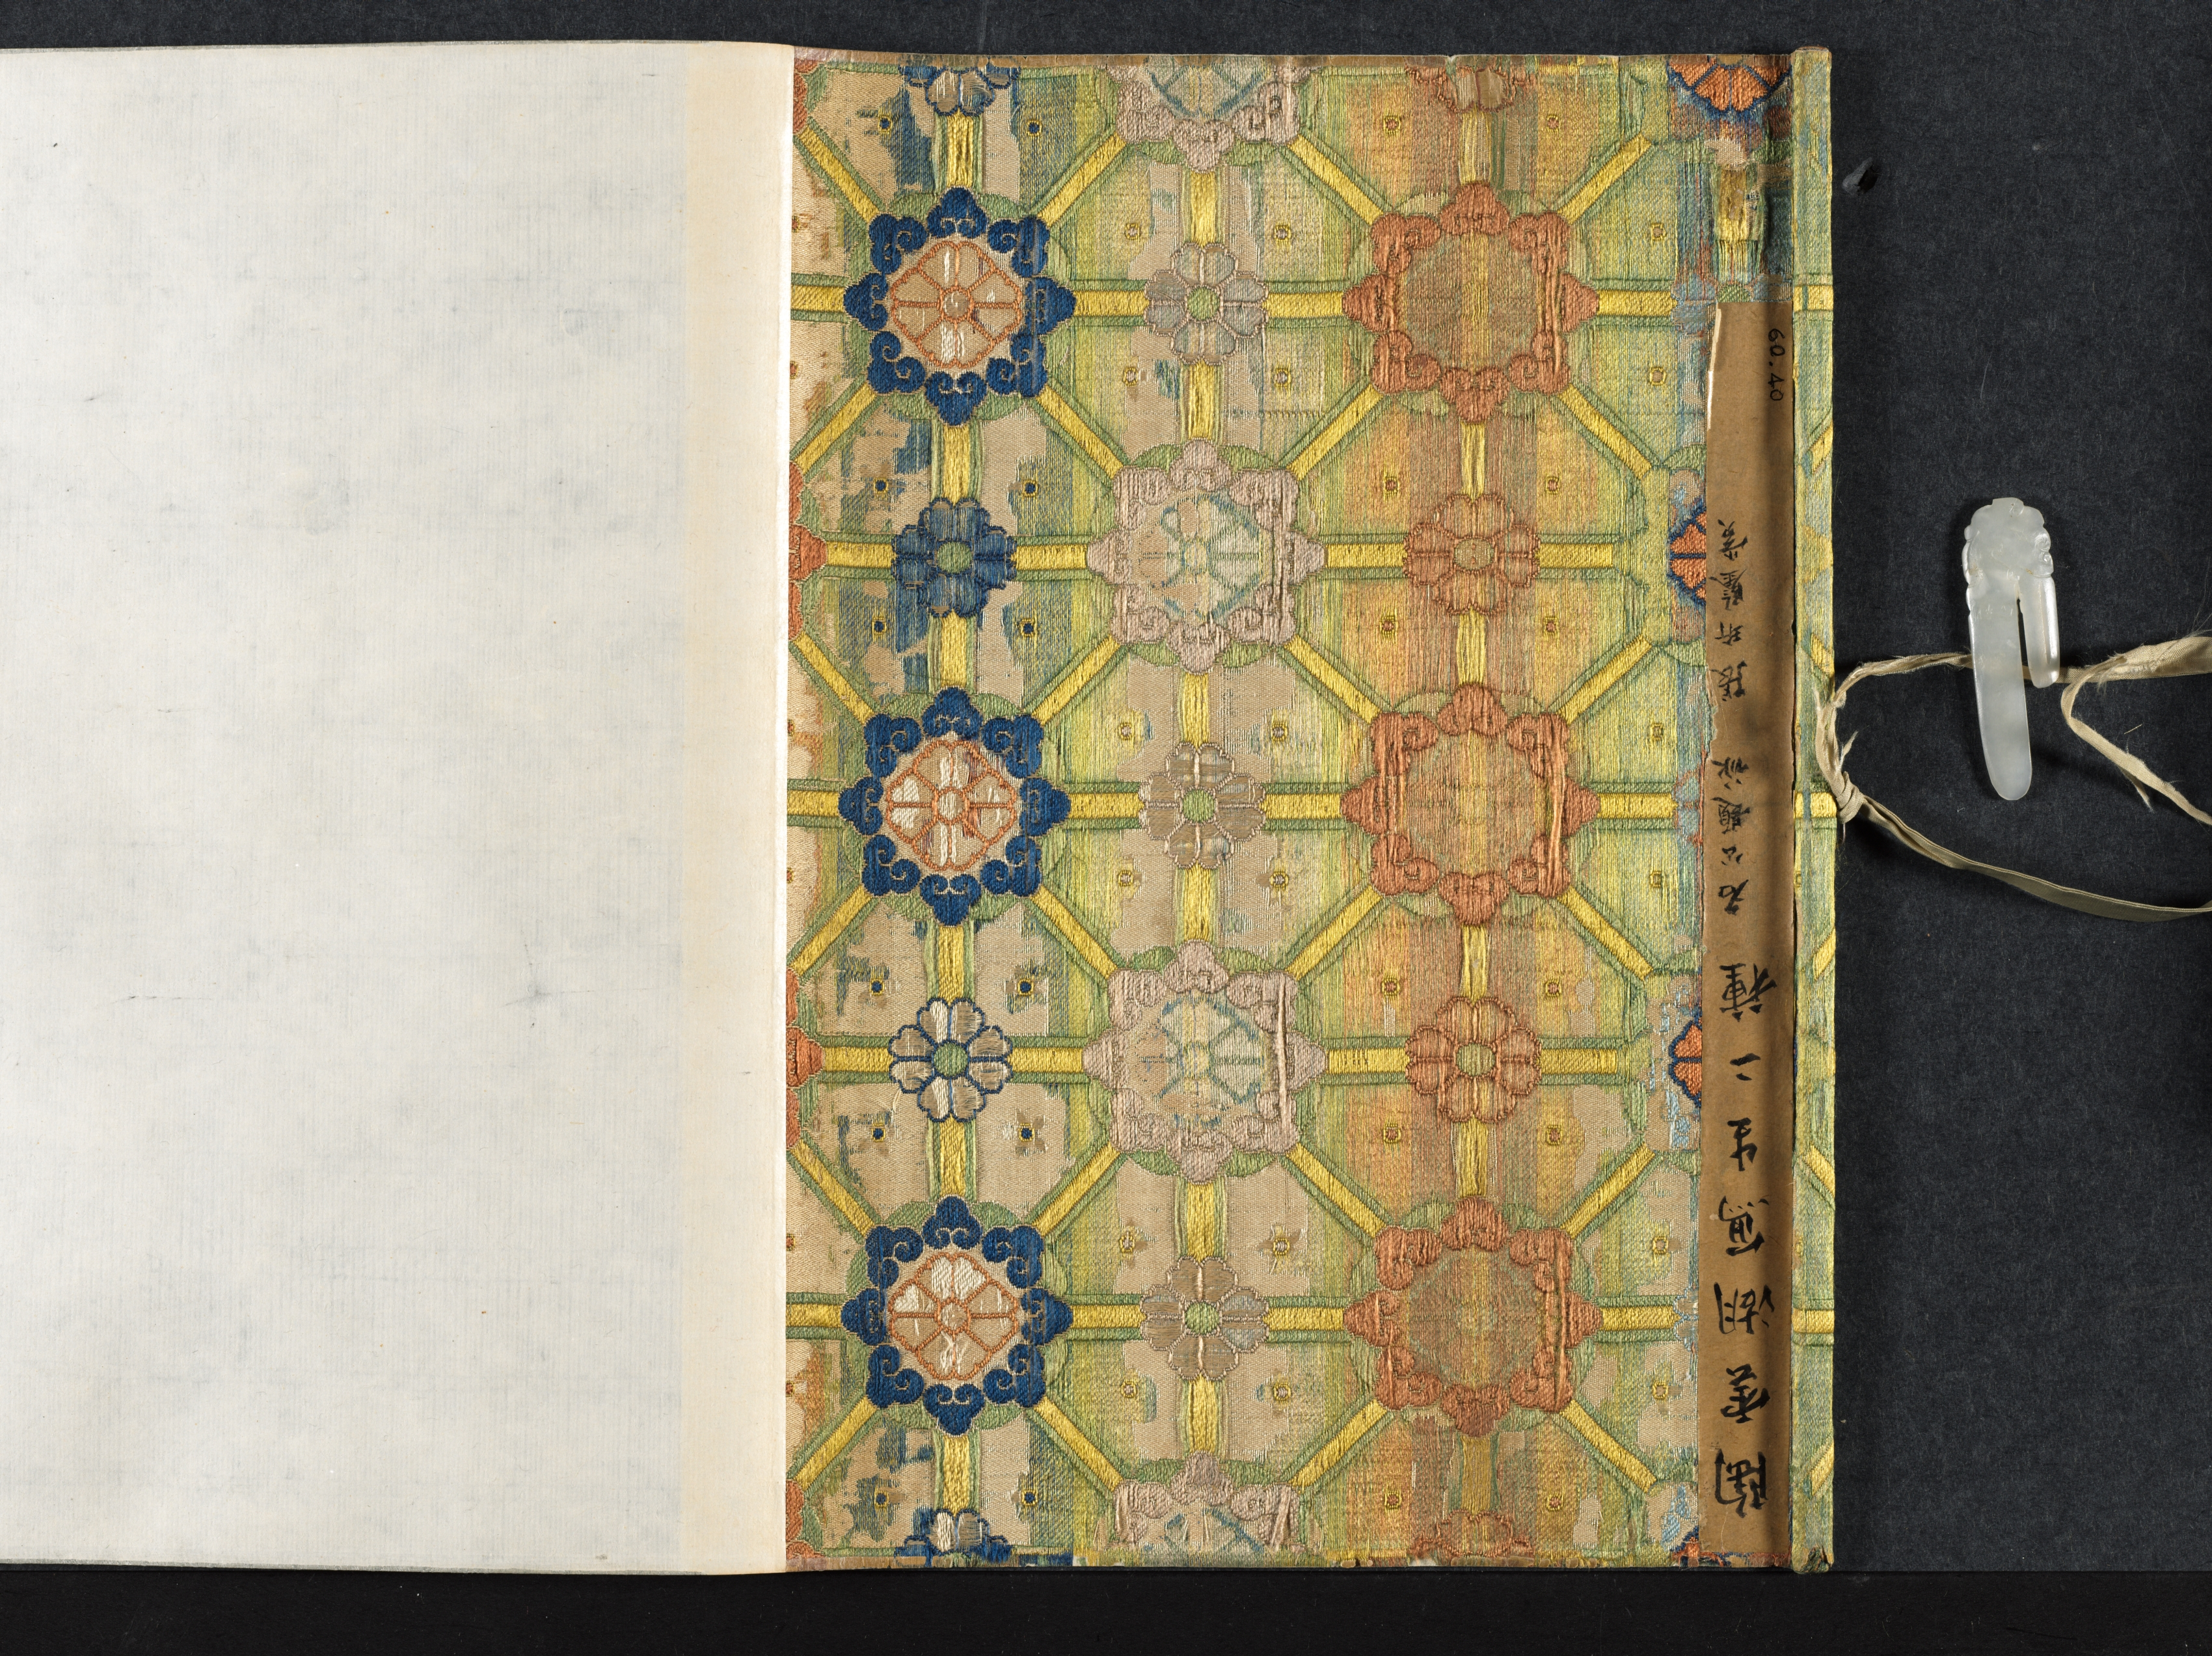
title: Chrysanthemums and Cabbage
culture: China, Ming dynasty (1368–1644)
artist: Tao Cheng (Chinese, active c. 1471–after 1502)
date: c. 1486 or before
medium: handscroll, ink and slight color on paper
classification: Painting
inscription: Artist's seal at beginning of painting: Yun hu 雲湖. Title by Wang Wenzhi 王文治 (1730–1802), date 1756. 2 seals of Wang Wenzhi 王文治 (1730-1802); 3 seals of Ku Yün (n. d.)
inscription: Section A (Chrysanthemums): 1 poem and 1 seal of Zhang Yuanzhen 張元禎 (1437–1507) - Jinshi, 1461; 1 poems and 3 seals of Ni Yue 倪岳 (1444–1501) - Jinshi, 1464; 1 poems and 2 seals of Zhao Xiang 趙祥 (life dates unknown) - Jinshi, 1469; 1 poems and 1 seals of Wu Xixian 吳希賢 (1437–1489) - Jinshi, 1464; 1 poems and 1 seals of Lü Chang 呂㦂 (1449–1511) - Juren, 1471; 1 poems and 3 seals of Fu Han 傅瀚 (1435–1502) - Jinshi, 1464; 1 poems and 1 seals of Feng Jue 馮珏 (life dates unknown) - Jinshi, 1478.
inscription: Chrysanthemums section, poem 1, by Zhang Yuanzhen 張元禎 (1437–1507): Several bushes of chrysanthemums grow in front of the Five-Willow Cottage,/ The yellow ones are really yellow and the white ones white./ This affable and decent fellow, young in years and unsophisticated,/ Has snapped one of the branches to dip in ink. (The Five-Willows Cottage was the home of the poet Tao Qian 陶潛 (Tao Yuanming 陶淵明, AD 365-427).) Chrysanthemums section, poem 2, by Ni Yue 倪岳 (1444–1501): Where at the Eastern Fence can you grieve for the Soul of the Xiang River?/ A man of upright character is mourned within the traces of ink./ White jade with a slight flaw would be a grievance forever,/ Later men should understand why even the roots of the flowers are washed. (Eastern Fence refers again to the poet Tao Qian 陶潛, while the Soul of the Hsiang River refers to the poet Qu Yuan 屈原 (c. 340–278 BC).) Chrysanthemums section, poem 3, by Zhao Xiang 趙祥 (life dates unknown): A clump of chrysanthemum grows in front of the bamboo pavilion,/ The winds of many autumns have blown since we parted beyond the river./ Straining wine through the official's cap of Tao [Qian] to prolong autumn's pleasures,/ The mists and clouds of ten thousand miles belong to the intoxicated. Chrysanthemums section, poem 4, by Wu Xixian 吳希賢 (1437–1489): It is a different spring if mulberry is planted during the latter part of the year,/ The dust of the world originally did not drop on clothing./ Who spills out ink under the Eastern Fence/ And paints so freely this portrait of chrysanthemums for the venerable Sir Tao? Chrysanthemums section, poem 5, by Lü Chang 呂㦂 (1449–1511): This full tray of ink for painting [flowers] at the Eastern Fence;/ Their whiteness or yellowness is not essential in capturing their beauty./ I don't have to go to Jiangnan to see them myself./ At my old house grow two or three branches. Chrysanthemums section, poem 6, by Fu Han 傅瀚 (1435–1502): Who daubed autumn flowers with ink/ As if they were dark dew on a branch tip only vaguely seen at evening?/ After the lazy clouds disperse, no one paints;/ A certain unconventionality pervades this painting. Chrysanthemums section, poem 7, by Feng Jue 馮珏 (life dates unknown): To satisfy his hunger, [the chrysanthemums] have at times entered the poetry of Qu Yuan;/ Taking up the wine cup, it felt close to Tao Qian./ [With them I am like] a lonely root sustained by deep water/ Or an old man to whose hair the color of youth returns.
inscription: Section B (Cabbage): 1 poem and 1 seal of Cai Qi 蔡圻 (life dates unknown) - degree information not known; 1 poems and 3 seals of Ni Yue 倪岳 (1444–1501) - Jinshi, 1464; 1 poem and 3 seals of Jiao Fang 焦芳 (1436–1517) - Jinshi, 1464; 1 poem and 3 seals of Li Dongyang 李東陽 (1447–1516) - Jinshi, 1464; 1 poems and 1 seals of Wu Xixian, signed “Xixian” 吳希賢 - Jinshi, 1464; 1 poems and 3 seals of Fu Han 傅瀚 (1435–1502) - Jinshi, 1464; 1 poems and 1 seals of Lü Chang 呂㦂 (1449–1511) - Juren, 1471; 1 poems and 2 seals of Zhao Xiang 趙祥 (life dates unknown) - Jinshi, 1469; 1 poems and 1 seals of Feng Jue 馮珏 (life dates unknown) - Jinshi, 1478.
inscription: Cabbage section, poem 1, by Cai Qi 蔡圻 (life dates unknown): The ink splashes are fresh from a frosty brush dipped in pond water;/ I can visualize that time when Yunhu 雲湖 [Tao Cheng] first showed his talents./ I lament the places where I scribbled before,/ Who would open them to inscribe a poem? (The first line is an allusion to the famous Jin dynasty calligrapher Wang Xizhi 王羲之 (AD 303-361), who practiced calligraphy so diligently at the edge of a pond that the water turned black with ink.) Cabbage section, poem 2, by Ni Yue 倪岳 (1444–1501): After rain the vegetables begin to grow;/ How are the colors of the masses lately!/ Once you get used to them, the tastiest parts are the ends of the roots;/ I don't know if they can be used for "seasoning soup." ("Seasoning soup" is an allusion to the statesmanship of a chief minister.) Cabbage section, poem 3, by Jiao Fang 焦芳 (1436–1517): This crop of purple stalks and green leaves is late and irregular;/ Now the rainy season is over for the Eastern Garden./ All the nobles nowadays dine on meat;/ Who of them knows the flavor of this [cabbage]. Cabbage section, poem 4, by Li Dongyang 李東陽 (1447–1516): It's always helped the honest man to sober up after drinks./ I intend to go to the deepest part of the stream-crossed garden/ To refresh myself in the fragrance and dew of evening. Cabbage section, poem 5, by Wu Xixian 吳希賢 (1437–1489): After rain, the white silk is filled with fragrant vegetables;/ How many times this happens in Mr. Tao's paintings./ On whom will you depend to present a memorial to the ruler?/ Don't let this color emerge on the faces of the people. (The last line is meant as a warning to officials: the color of the vegetables (green) may be pleasing in itself, but when it emerges on the faces of the starving poor, it signifies a badly governed world.) Cabbage section, poem 6, by Fu Han 傅瀚 (1435–1502): For twenty years I have feasted on the excellent mutton of an official;/ Yet I talk and dream about the garden and its vegetables./ Do not merely say it is good to chew the root of the cabbage--/ You must taste to understand what poverty is. Cabbage section, poem 7, by Lu Chang 呂㦂 (1449–1511): The capital is never a place for an apprentice in the "garden of scholarship."/ Who would write about gardens and vegetables on an examination paper?/ I've walked throughout the country in spring;/ Make sure the people don't show this color. Cabbage section, poem 8, by Zhao Xiang 趙祥 (life dates unknown): After a wash of rain, the spring garden is still in order;/ The flavor [of the cabbage] is more suitable with a small drink and the hum of a tune./ The rich and powerful in their mansions consume dish after dish of meat;/ Vegetarian food is known only by the scholars. Cabbage section, poem 9, by Feng Jue 馮珏 (life dates unknown): A new cabbage is nourished with dew;/ It takes a long time to grow and mature./ The business of "seasoning the soup" is your responsibility;/ Better command the gardener to take care [of the cabbages]. trans. HK/LYSL/WKH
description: On an autumn day in Beijing, Tao Cheng had a gathering with a group of scholar-officials and created two paintings in a spontaneous, casual style. The first depicts chrysanthemums, slender bamboo stalks, and a rock in monochrome ink. Tao applied light colors for the second painting that depicts cabbage. Tao deliberately placed the images on the first sections of the paper so that his honorable guests could add their poetic inscriptions inspired by his imagery. In the first section to the right, all seven poetic inscriptions refer to the beloved poet and recluse Tao Qian (also called Tao Yuanming, AD 365–427) who was particularly known for his profound love for chrysanthemum flowers. Most of the inscriptions in the second section express sympathy for the poor, since cabbage is the main ingredient in their humble food. Taken together, the poems and paintings allude to the life and responsibilities of the scholar-official: the importance of both an upright character and a concern for the poor citizens in order to achieve good government.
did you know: Eminent calligrapher Wang Wenzhi 王文治 was only 27 sui when he wrote the title in 1756.